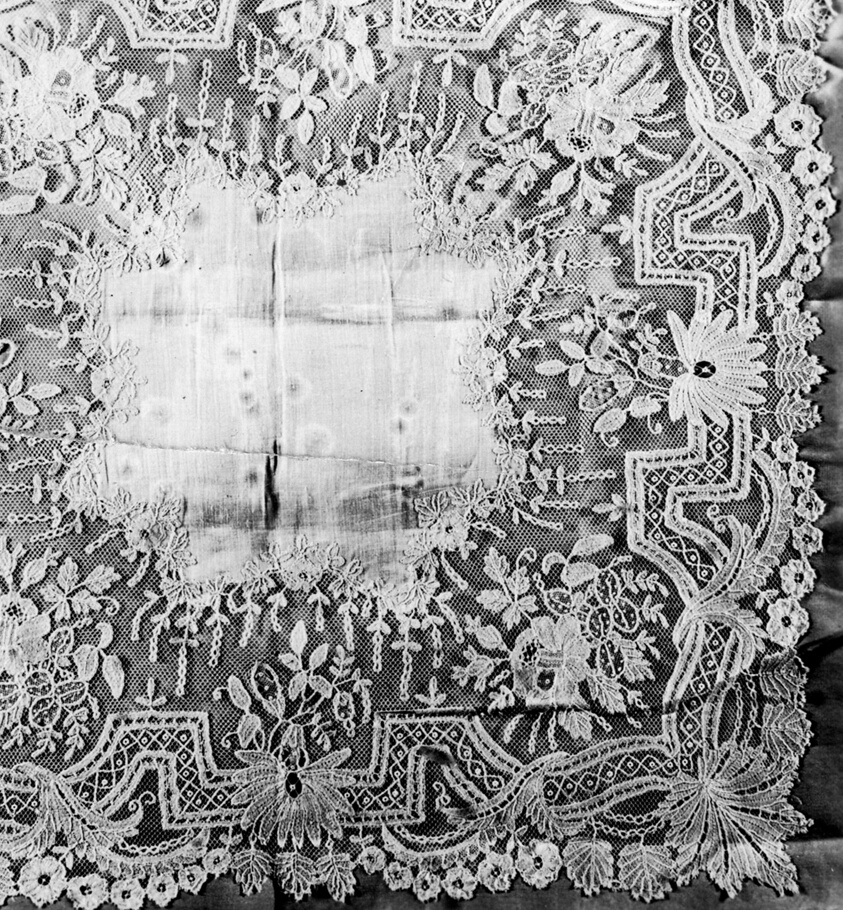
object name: Textile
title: Handkerchief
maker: Belgium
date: 1850/75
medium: Linen, plain weave; edged with cotton and linen, mixed lace known as "Brussels application lace:" bobbin and needle laces applied to machine-made net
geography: Belgium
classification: textile; lace - mixed